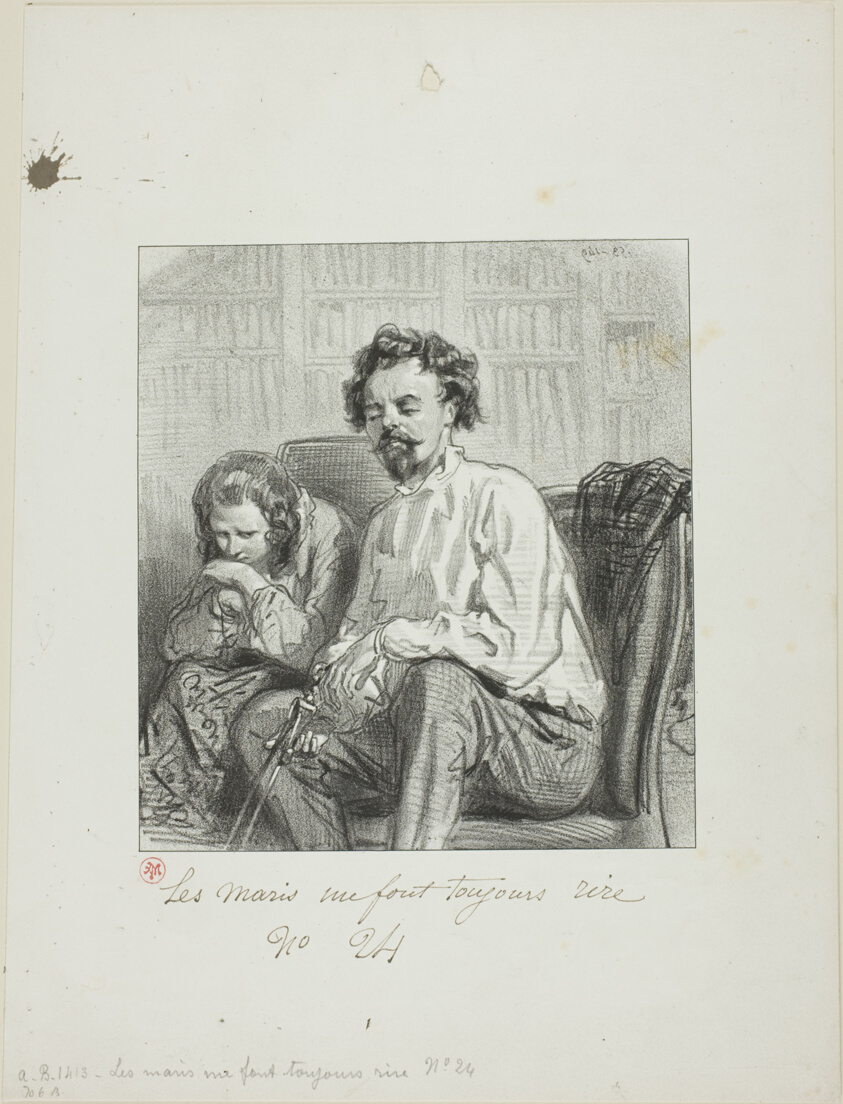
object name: Print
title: Husbands Always Make Me Laugh: Ninie, I've just had an idea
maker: Paul Gavarni (French, 1804-1866)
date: 1853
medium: Lithograph in black on cream wove paper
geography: France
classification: lithograph; print; prints and drawing